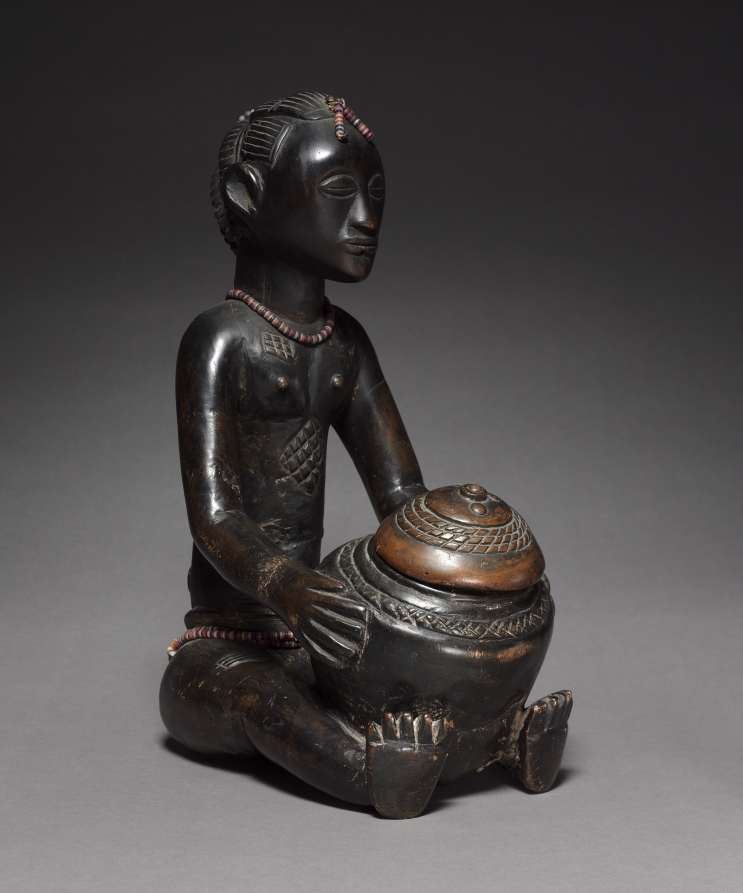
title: Female Bowl-Bearing Figure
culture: Africa, Central Africa, Democratic Republic of Congo, Luba-style carver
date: late 1800s-early 1900s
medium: Wood, glass beads, upholstery studs, plant fiber, and iron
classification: Sculpture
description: In Luba-style art, an object's beauty affects how well it works. While bowl-bearing figures had many possible uses, a royal diviner likely used this well-carved image of a woman carrying a bowl in rituals. Dusty traces of mpemba (white chalk) fleck the shining exterior and the bowl's interior, showing it once held this sacred powder. Diamond-shaped scarification marks at her waist, chest, and back add to her beauty. Her hair is carved into the cascading layered hairstyle worn in the Luba region at the turn of the twentieth century. Strands of imported glass beads encircle her waist and neck, and dangle from her hair. The alternating white and blue beads may symbolize the moon and Mbidi Kiluwe, a culture hero linked to royal practice and smithing. While much Luba-style art depicts women—who are societally important—men created and owned the majority of such works.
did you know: Symbolic of anvils, the round metal tacks decorating the figure's hair "pin" spirits and their secrets within it. They are at the hairline and each of the four hair cascades (the bottommost is now gone).